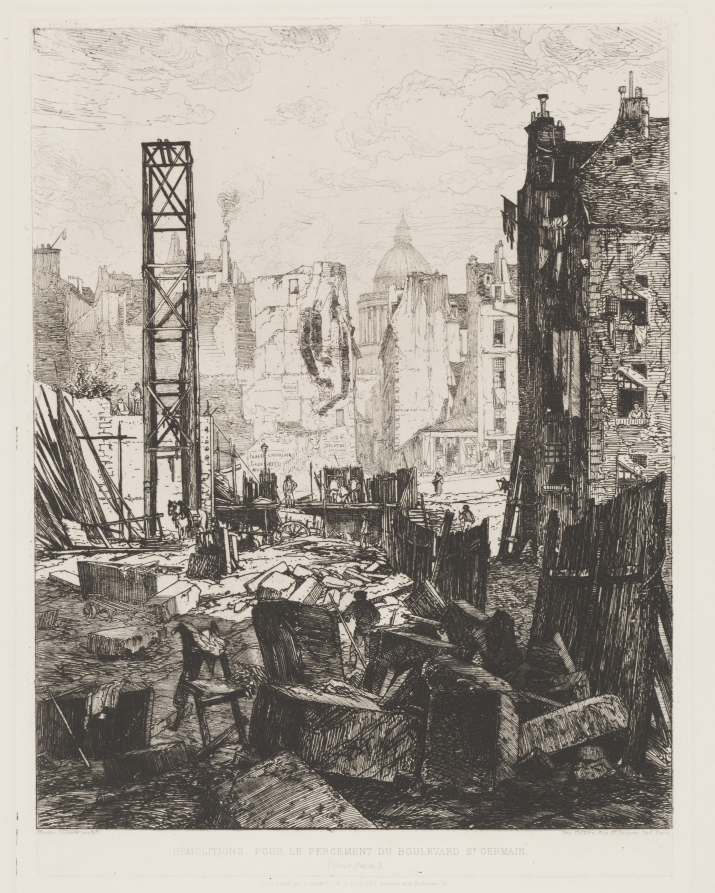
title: Demolition for the Opening of Boulevard St. Germain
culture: France, 19th century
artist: Maxime Lalanne (French, 1827–1886)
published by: A. Cadart & J. Luquet, rue Richelieu, 79, Paris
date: 1862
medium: etching on chine collé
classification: Print